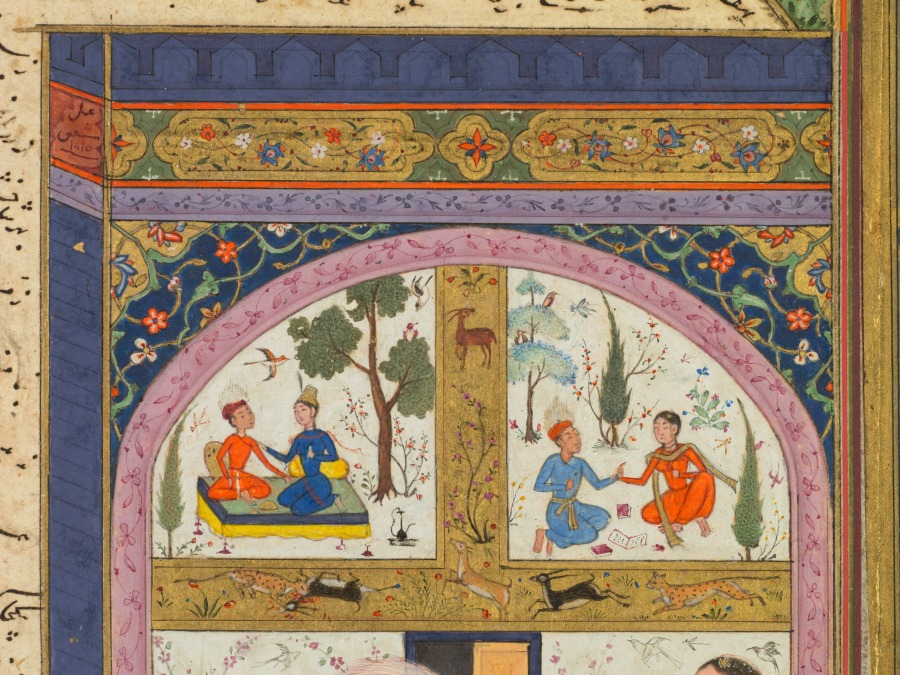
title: Zulaykha in her palace and as an elderly woman with Joseph (recto), from a Panj Ganj (Five Treasures) of Abd al- Rahman Jami (Persian, 1414–1492)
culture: Western Afghanistan, Herat (text); Mughal India (paintings)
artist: Mushfiq (Indian, active early 1600s)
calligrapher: Sultan 'Ali al-Mashadi (Iranian, 1430–1520)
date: 1603–7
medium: Gum tempera, ink, and gold on paper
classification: Painting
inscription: [[Upper left of painting, against a red background, in nasta’liq script]] ' amal - i Mushfiq sana 1015 Text on verso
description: The golden pot of white narcissus flowers at the bottom center of the painting signals that Zulaykha, leaning on her staff to the left, will imminently have her youth and beauty restored. In this Persian retelling of the Old Testament account from the Bible, Zulaykha lusted after Joseph, even though she was already married to Potiphar. Joseph, with the golden halo, resisted her advances until she became a widow and retained his youth, because of his extreme virtue. Above, Zulaykha as a young woman waits for Joseph in her house where murals of them as a happy couple are painted on the walls.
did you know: Zulaykha is shown four times: twice in the murals, seated in the center, and below when she is much older.